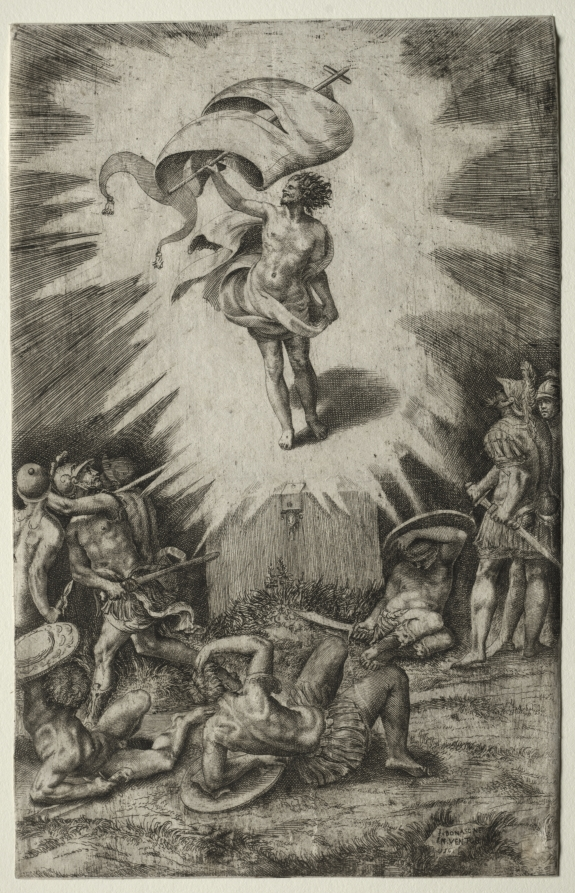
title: The Resurrection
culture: Italy, 16th century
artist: Giulio Bonasone (Italian, c. 1510–after 1576)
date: 1561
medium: etching and engraving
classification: Print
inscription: lower right, in plate: I. BONASONE / INVENTOR / 1561 ; VERSO, by Pierre Mariette, lower left, in pen and brown ink: P. mariette 1696 ; lower right, in graphite: N° 45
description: Chiefly a reproductive printmaker, he made about 360 prints after the leading Italian artists of the period, including Parmigianino, Giulio Romano, and Titian. One of the few prints designed and executed by Bonasone, this is an exceptional work. Its innovative use of etching to achieve dramatic tonal effects probably results from Parmigianino's influence.